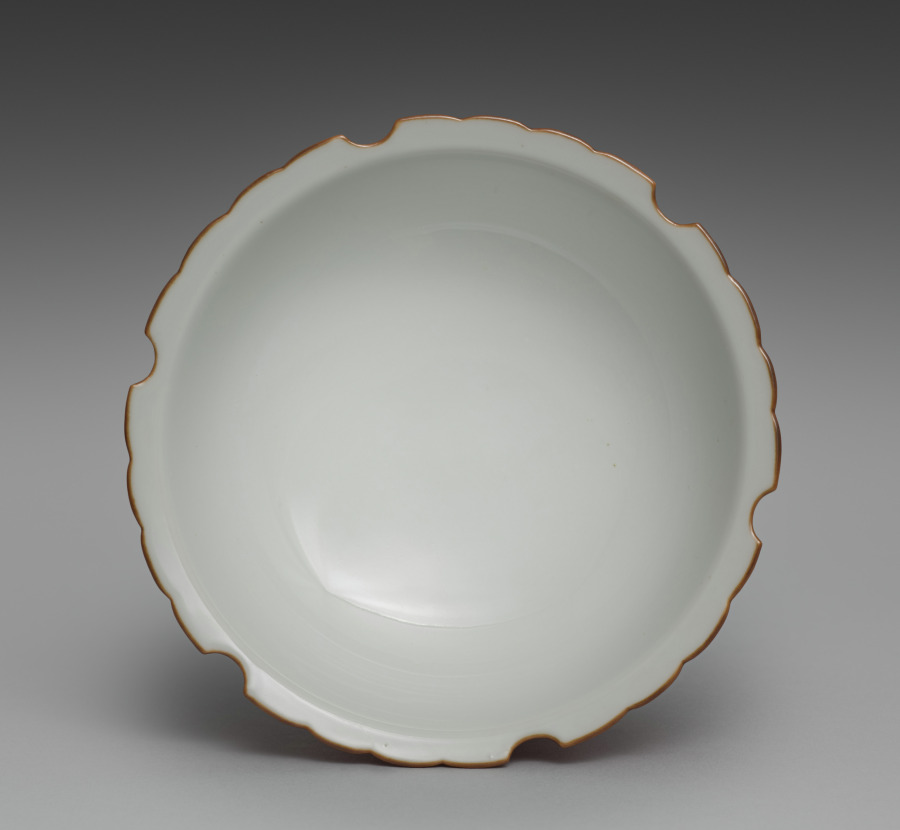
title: Dish from Snow-Flake Side Dishes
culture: Japan, Meiji period (1868–1912)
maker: Seifū Yohei III (Japanese, 1851–1914)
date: 1893–1914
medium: One from a set of six porcelain dishes; porcelain with lobed rims and pink glaze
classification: Ceramic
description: According to the box lid, this set of six side dishes, or mukōzuke, are “snow-flower style” (sekkashiki), having mouths shaped like snowflakes. Their mouths, which have six lobes and scalloped edges, are traced with brown iron oxide at the rim. The outside of each bowl is glazed with a very bright pink over the basin and foot, and the inside is left white. From directly above, one sees a snowflake-like shape, and from the side, they seem to float above a rosy ground.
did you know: The box for this set of dishes has an inscription on the side noting that they were for a person with the family name Nakamoto.